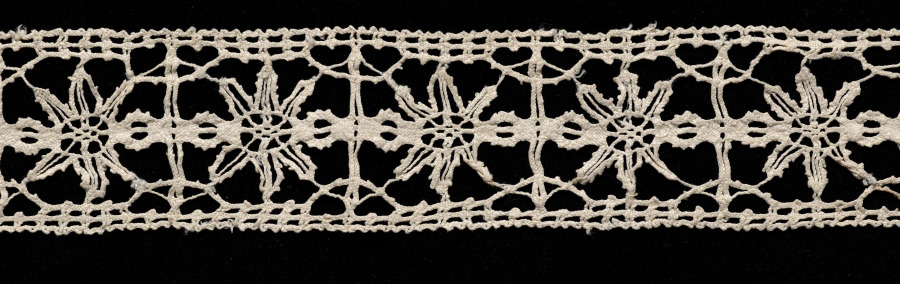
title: Lace Insertion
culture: Italy, Venice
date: 1580–99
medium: Bobbin lace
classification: Lace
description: This piece of bobbin lace is based on a needle lace (reticella) design.